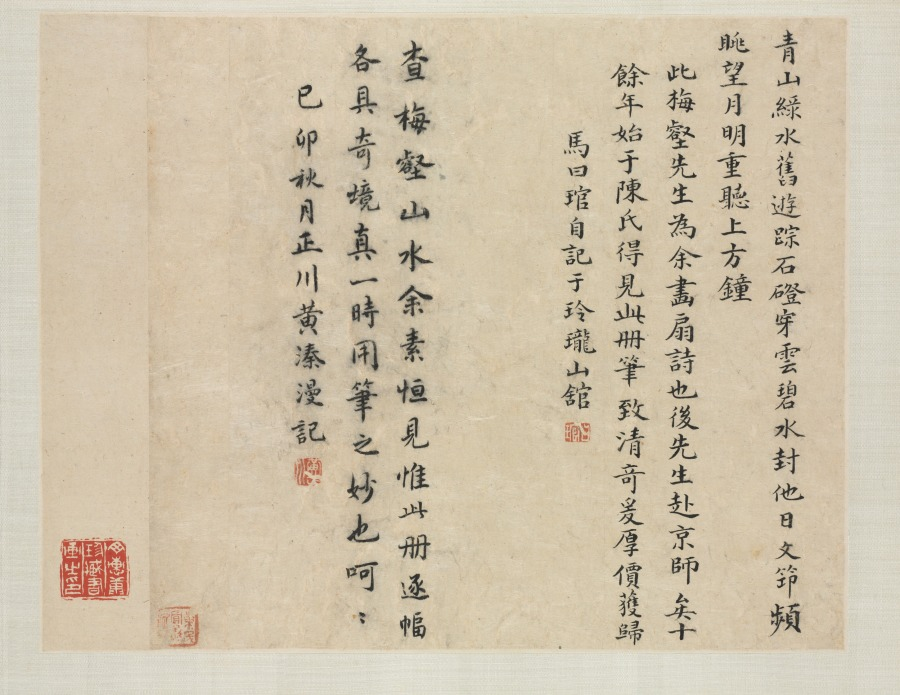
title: Album of Seasonal Landscapes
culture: China, Qing dynasty (1644-1911)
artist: Zha Shibiao (Chinese, 1615–1698)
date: 1684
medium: Album of twelve leaves; ink or ink and light color on paper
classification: Painting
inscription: Artist's inscriptions, signatures, and 16 seals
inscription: 2 colophons and 12 additional seals: 1 colophon and 1 seal of Ma Yueguan 馬曰琯 (1688–1755); 1 colophon, dated 1759, and 1 seal of Huang Cou 黃湊; 2 seals of Liu Haisu 刘海粟 (1896-1994)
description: Zha Shibiao, a native of Anhui province, moved to Yangzhou later in his career, like so many of his fellow countrymen. At age 68, he painted this album with seasonal landscapes in various styles. Painted in fresh colors and wet strokes, all depict typical scenes of Jiangnan, the Yangzi delta: a herdboy on a buffalo wading through water, boating on the stream to the Peach Blossom Spring at Wulin, a waterfront town shrouded in mist, a scholar on his donkey enjoying the red autumn leaves, and drinking tea on a boat while watching migrating birds.